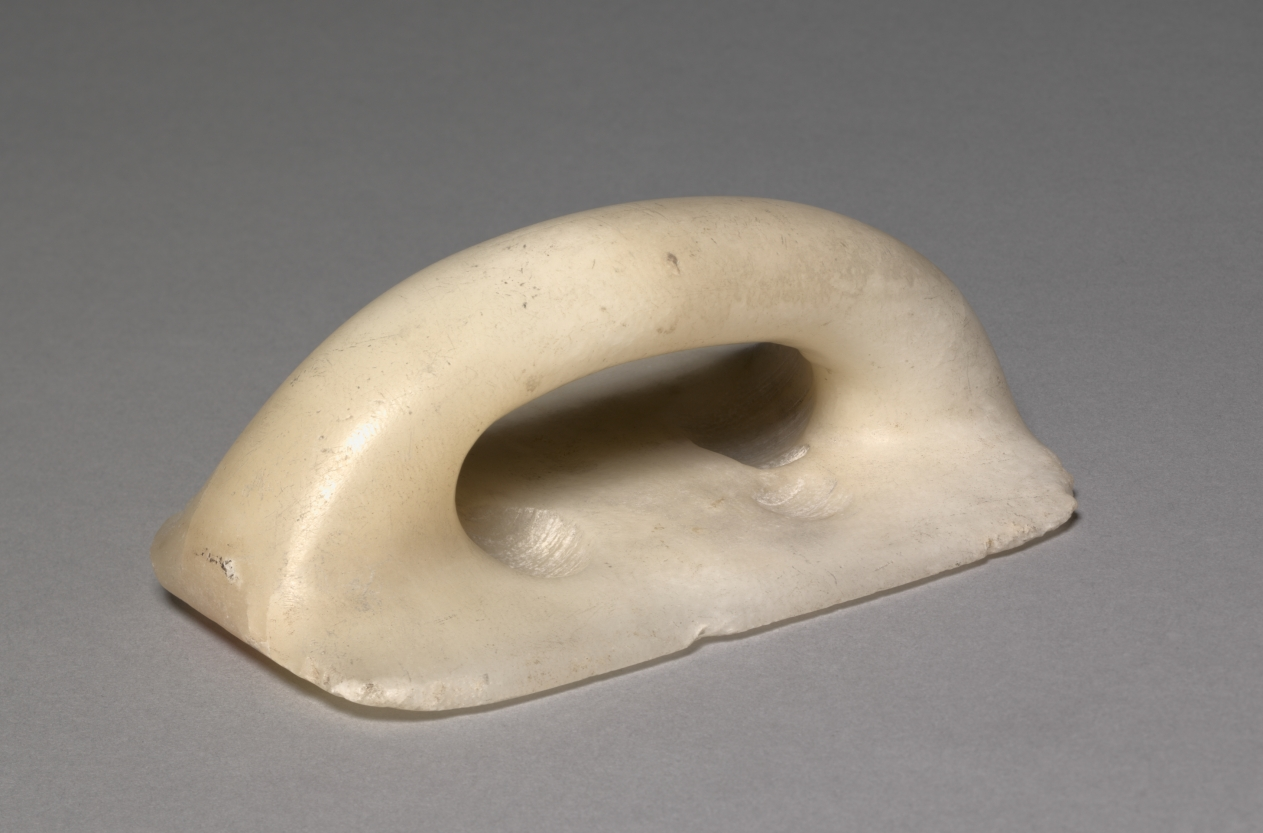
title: Plasterer's Float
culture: Egypt, Middle Kingdom (2040–1648 BCE), Dynasties 12–13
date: 1980–1648 BCE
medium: travertine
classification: Implements